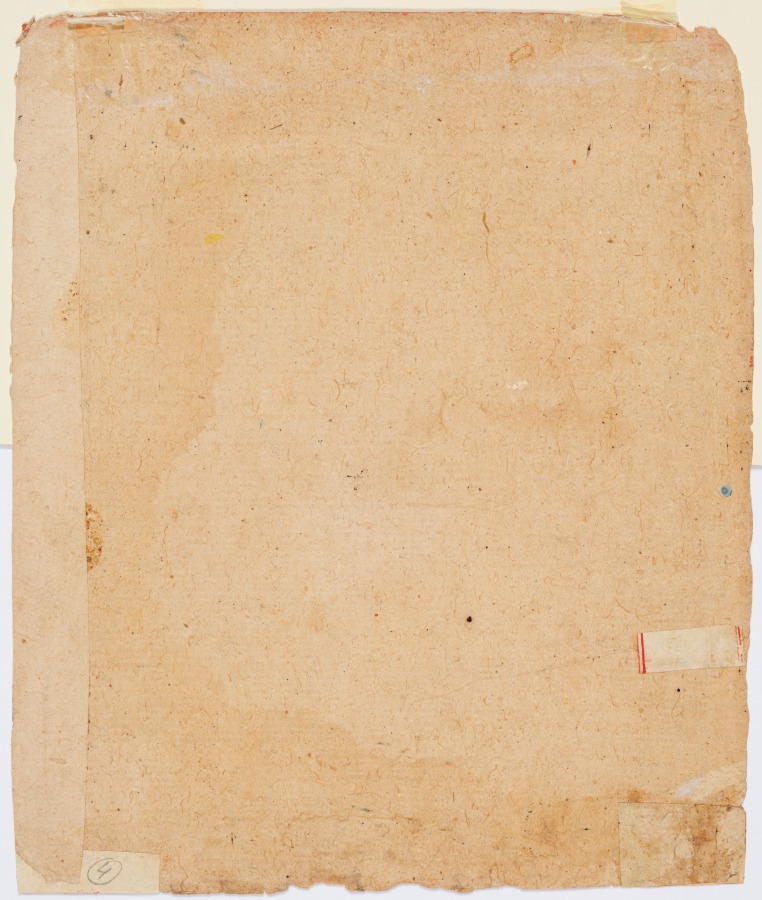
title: Goddess Mangala, from a Devi Series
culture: India, Rajasthan, Ajmer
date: c. 1660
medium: Gum tempera on paper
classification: Painting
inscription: śrī maṃglā 3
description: The four-armed goddess sits on an open lotus against a dark green background. She holds a discus, sword, bowl of cakes, and a shield. Banana trees flank her, and her tiger mount stands beneath. The subject in the painting appears to be a regional form of the Devi, as the name “Mangala” does not appear in major Hindu scriptures.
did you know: Banana flowers hang pendant and are bright pink.